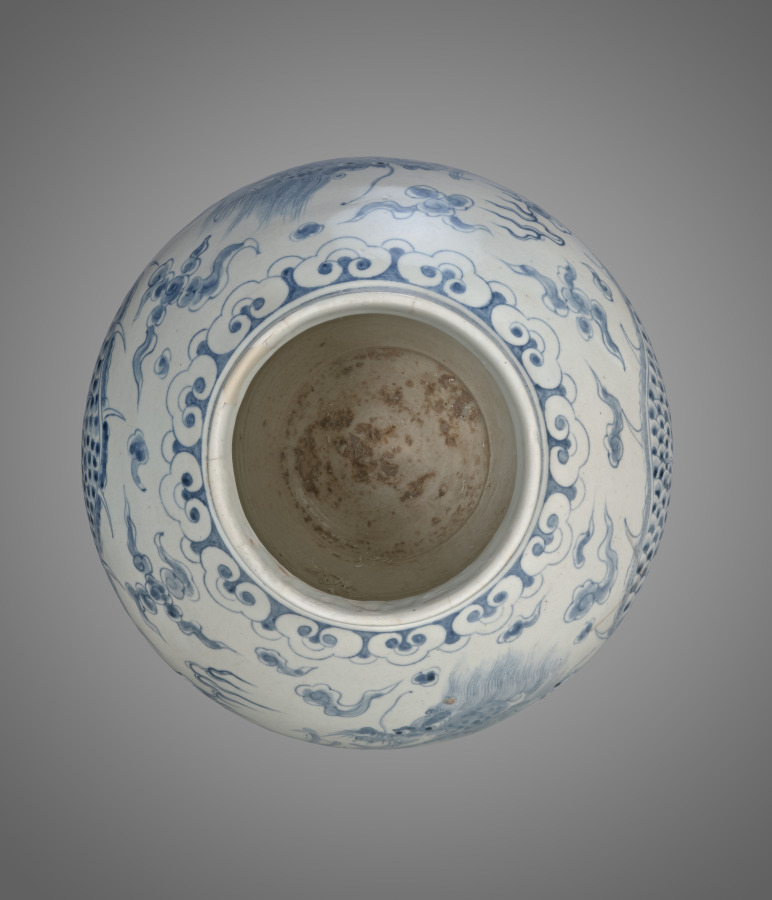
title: Jar with Dragon Design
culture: Korea, Joseon dynasty (1392–1910)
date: 1700s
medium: porcelain with underglaze blue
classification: Ceramic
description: As a mythical creature believed to make rain, the dragon served as a symbol of rulers in premodern East Asia. Here, a cobalt blue dragon is depicted flying through clouds to catch a flaming, wish-granting jewel called a cintamani. In the royal court, the shorter type of dragon jar held wine, while the tall type, like this one, held flowers. This porcelain once belonged to Robert W. Moore, who developed an interest in Korean art while serving in the US Army in South Korea during the 1950s and 1960s. Later, the CMA acquired this important work through an auction sale in 1986.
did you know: A mythical creature believed to have the power to make rain, the dragon is a prominent symbol of rulers in premodern East Asia; the image of dragons was used exclusively for the king's paraphernalia.